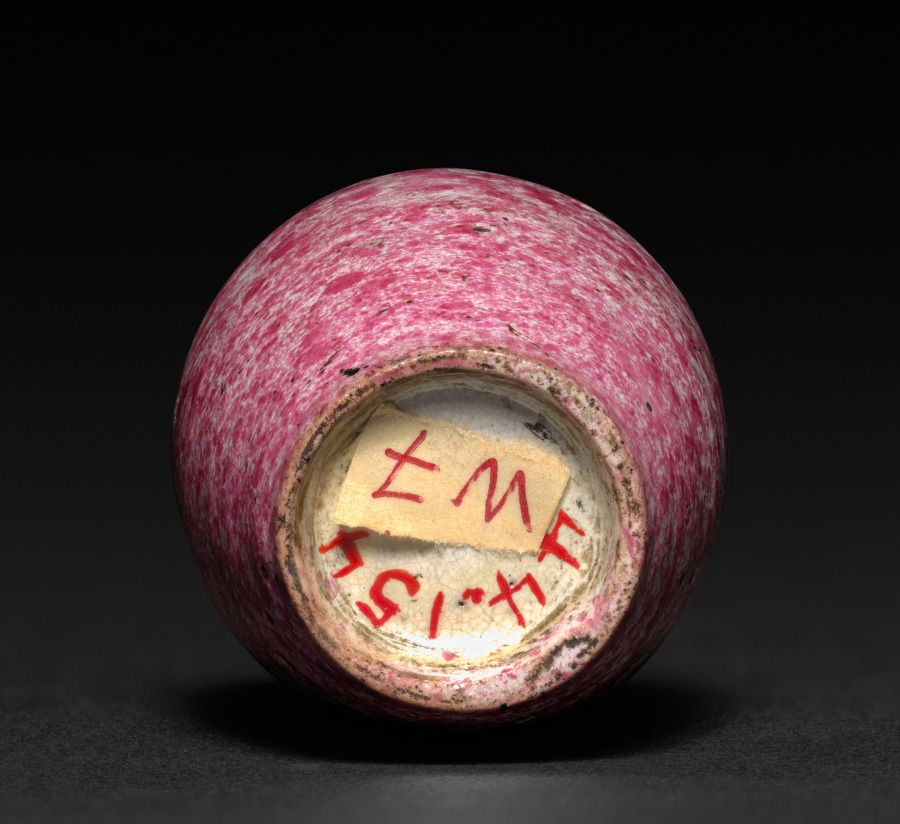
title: Miniature Vase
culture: China, Qing dynasty (1644–1911), Qianlong reign (1736–95)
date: 1736–95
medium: porcelain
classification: Ceramic